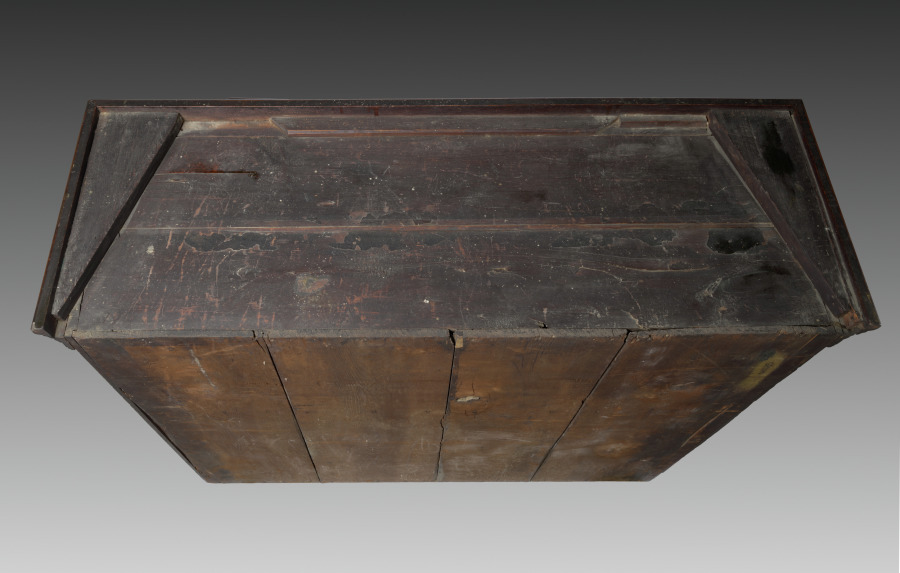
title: Kast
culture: American, King County, NY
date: c. 1710–1740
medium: Various woods, wrought iron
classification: Furniture and woodwork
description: The earliest furniture made in America often shared similarities with works made in the country from where the settlers originated. With its bun feet, paneled surface, and broad projecting cornice, this wardrobe (kast) resembles earlier Dutch examples that come from Amsterdam and its surrounding areas. Therefore, this wardrobe was likely made by the Dutch settlers who colonized New York and New Jersey.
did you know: This Dutch American wardrobe was likely made in a community along the Hudson River in New York by a cabinetmaker who had originally come from the region in or around Amsterdam in Holland.